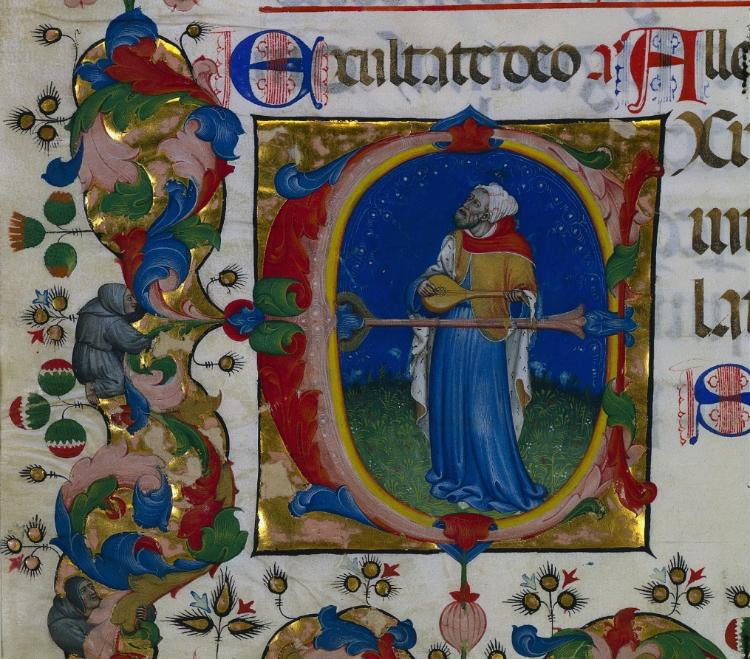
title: Single Leaf Excised from a Choir Psalter: Initial E[xultate Deo] with King David Playing the Lute (Psalm 80)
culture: Italy, Bologna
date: c. 1408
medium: ink, tempera, and gold on vellum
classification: Manuscript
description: This leaf once formed part of a deluxe choir psalter produced for the Franciscan convent of Bologna (founded 1229). The initial E with a portrait of King David illustrates the introduction to Psalm 80: Exultate Deo (Rejoice to God). King David, as the author of the Psalms, is prominently illustrated in psalter initials. An abundant spray of colorful acanthus leaves with clambering Franciscan friars provides decoration for the lower left margins and confirmation that it was made for Franciscan use.